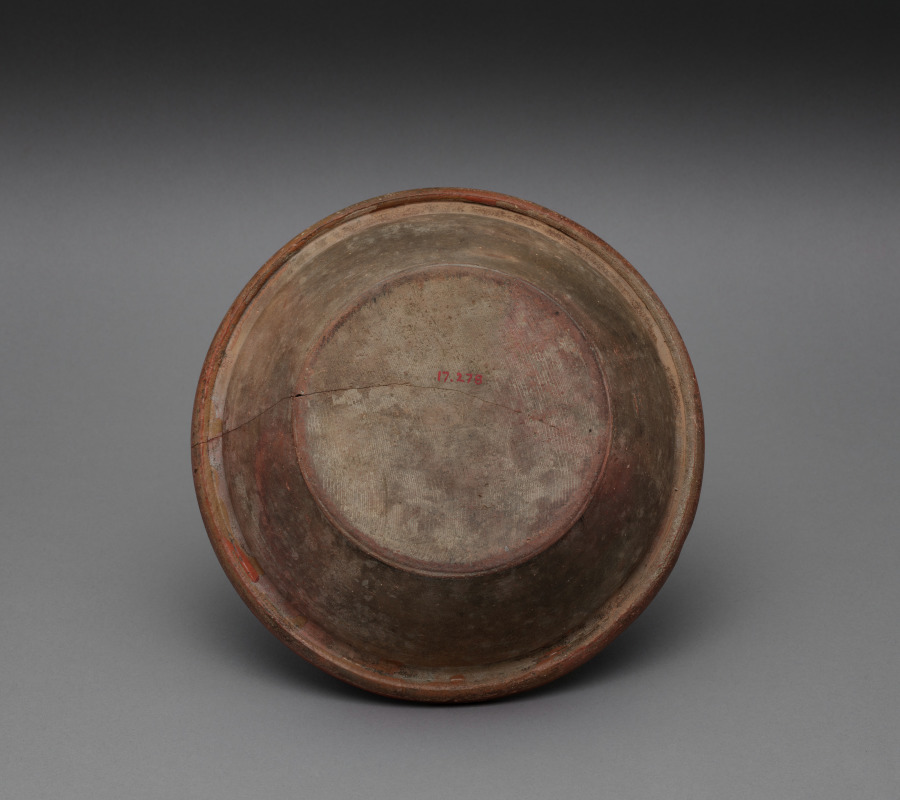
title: Dish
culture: Germany, Bingen on the Rhine, 18th century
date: 1792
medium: earthenware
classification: Ceramic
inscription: "Mit Gott Soll Man in allen Sachen Den Anfang und das Ende machen. 1792" (With God all your affairs attend from the beginning to the end. 1792).